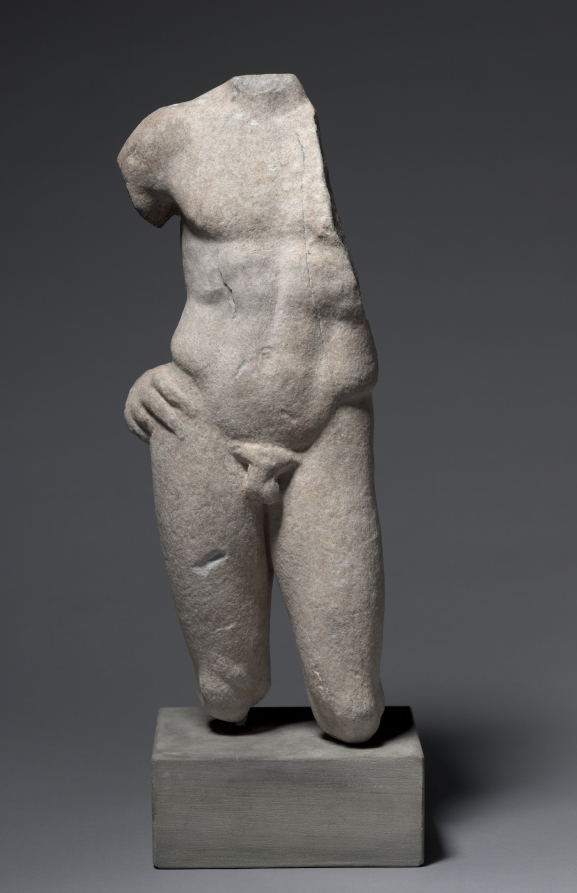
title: Torso of a Youth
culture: Greece, Athens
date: 400–375 BCE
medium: marble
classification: Sculpture